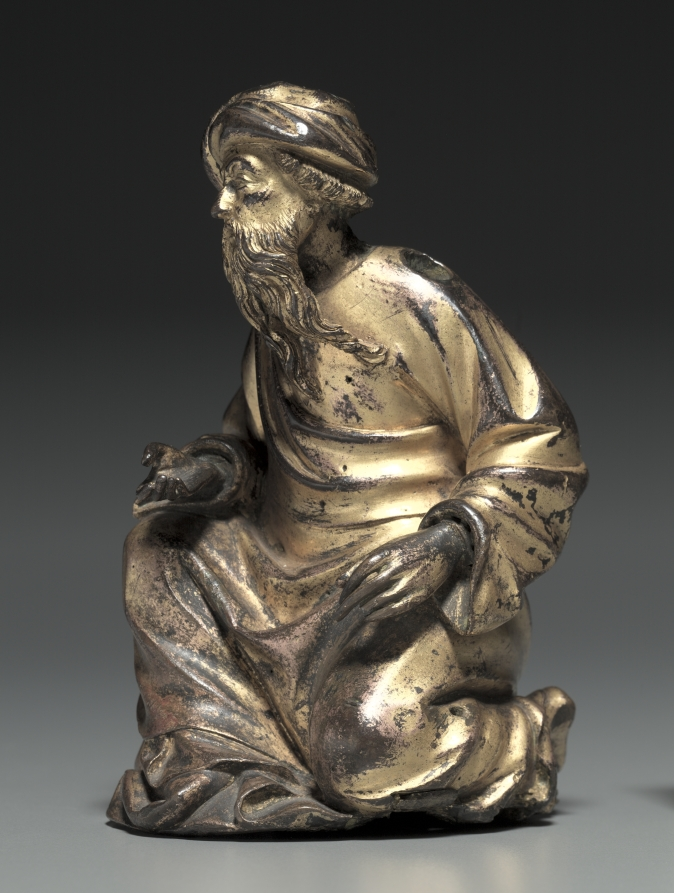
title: Kneeling Prophet from the Reliquary Chasse of Saint-Germain-des-Prés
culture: France, Paris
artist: Jean de Clichy (French)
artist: Gauthier du Four (French)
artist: and Guillaume Boey (French)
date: 1409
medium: gilt bronze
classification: Sculpture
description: This figure is one of only two known surviving fragments of the Reliquary Châsse of Saint-Germain. Fashioned from silver, gold, and precious stones, it was designed to hold the body of the saint. A contract from 1409 gives the names of the commissioned goldsmiths: Jean de Clichy, Gautier du Four, and Guillaume Boey.The reliquary was housed in the ancient Benedictine Abbey of Saint-Germain-des-Prés in Paris and formed the monastery’s great treasure until it was destroyed in the French revolution. The exquisite modeling of the prophet, originally a supporting foot of the reliquary, reveals the sophistication of Paris around 1400.